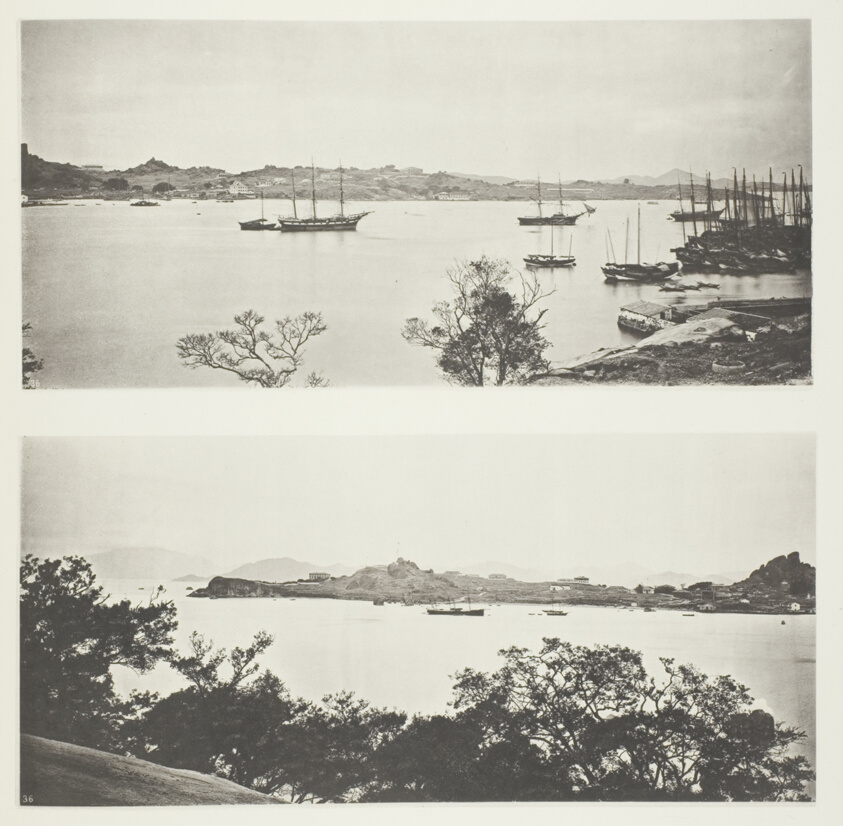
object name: Photograph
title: Island of Kulangsu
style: 19th century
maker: John Thomson (Scottish, 1837–1921)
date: c. 1868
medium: Collotype, pl. XII from the album "Illustrations of China and its People, Volume II" (1873)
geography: Scotland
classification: photography; photograph